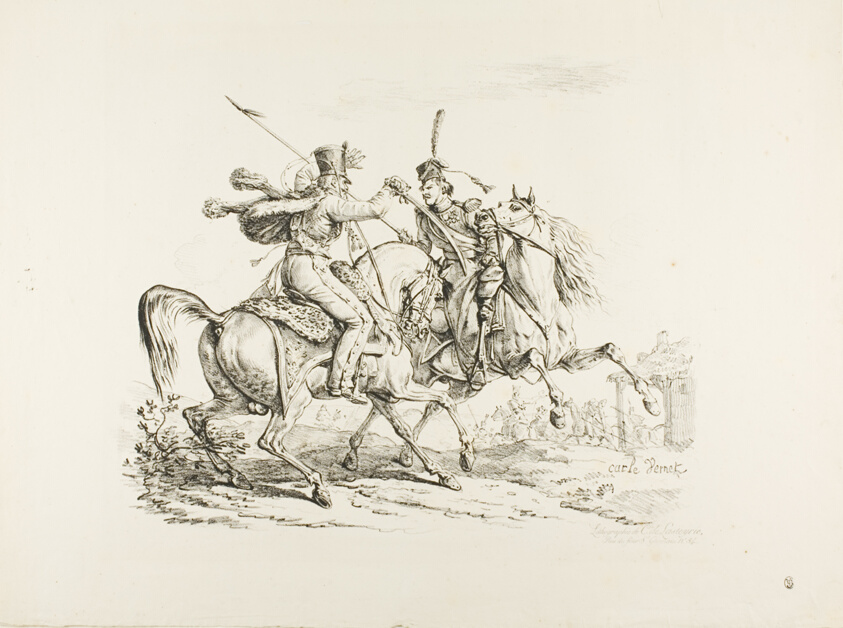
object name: Print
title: Hussard Killing a Cossack with a Sabre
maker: Carle Vernet (French, 1758-1836); printed by Comte Charles Philibert de Lasteyrie (French, 1759-1849)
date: February 21, 1817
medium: Lithograph in black on ivory wove paper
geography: France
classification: lithograph; print; prints and drawing